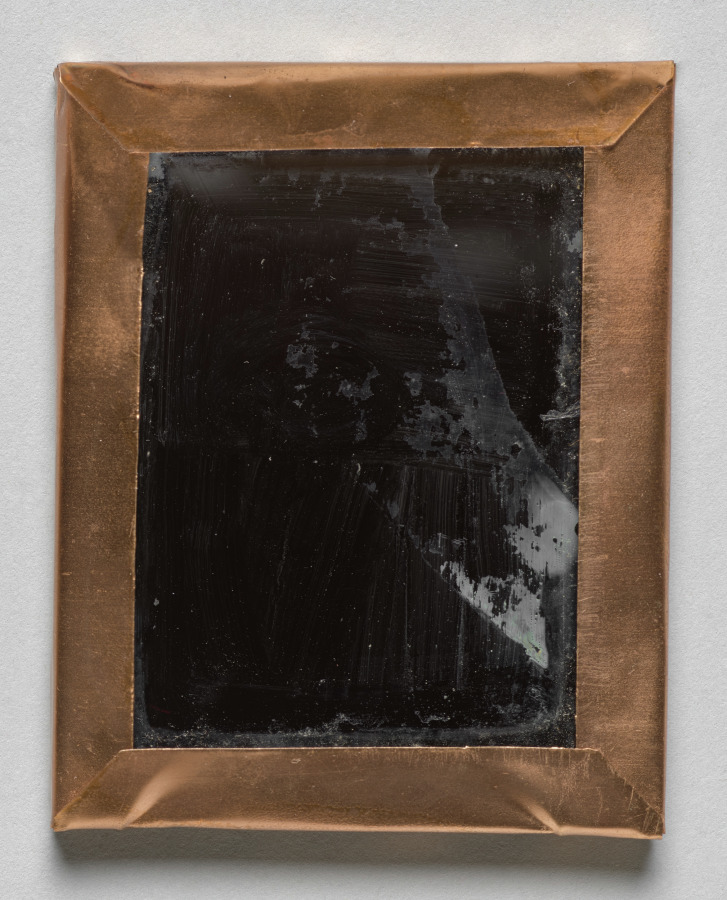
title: Wife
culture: America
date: c. 1860–65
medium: ambrotype, hand-tinted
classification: Photograph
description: You rarely see a smiling portrait from the mid-19th century. Having your photograph taken was a serious and rare endeavor, plus it was difficult to hold any animated expression long enough for the exposure times required by the early processes. Sitters were instructed to find ways to keep from moving, such as clasping their hands. The woman here has taken the photographers’ cautions to an extreme, resulting in a tense and unflattering portrait.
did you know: In the early decades of photography, many people did not know how to pose for the camera.